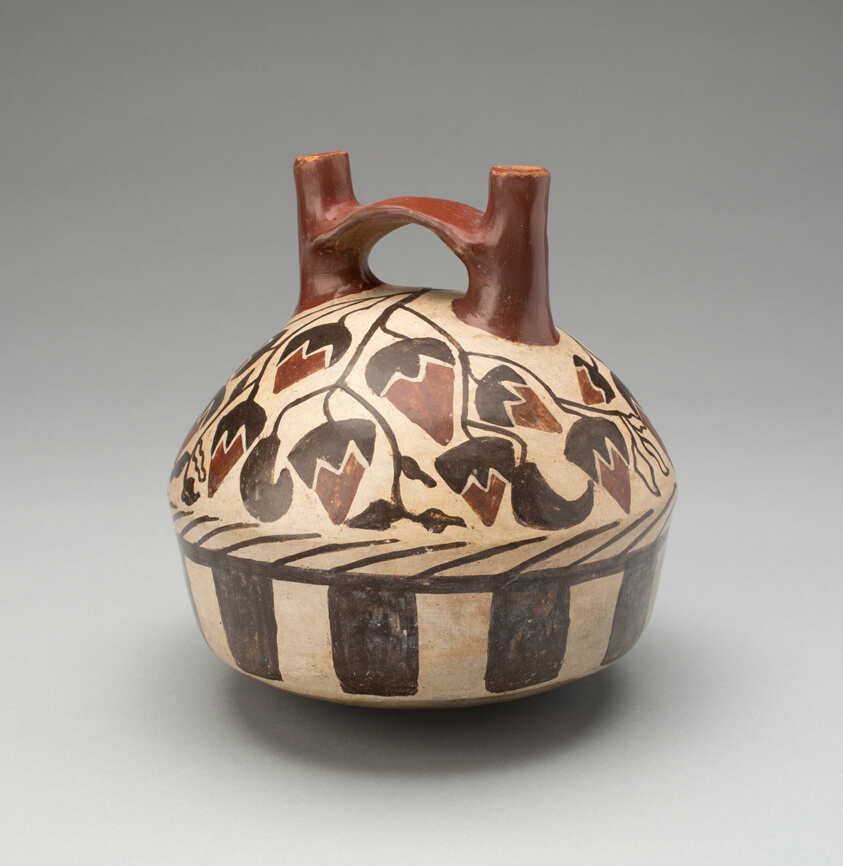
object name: Vessel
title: Vessel Representing a Basket Containing Lúcuma Fruits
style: nazca, early intermediate period, Pre-Columbian, americas, Arts of the Americas, andean, andes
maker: Nazca; South coast, Peru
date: 180 BCE–500 CE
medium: Ceramic and pigment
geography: Peru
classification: earthenware; art of the americas; ceramics; vessel